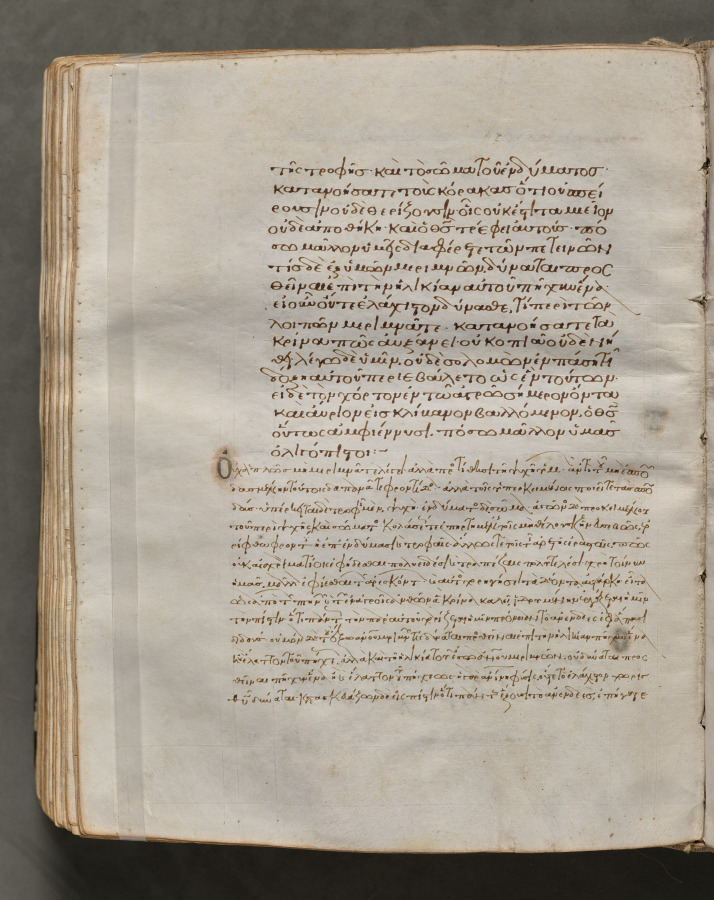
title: Text, folio 267 (verso), from a Gospel Book with Commentaries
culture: Byzantium, Constantinople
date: c. 1000–1100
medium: ink, tempera, and gold on vellum; leather binding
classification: Bound Volume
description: Each of the four gospels in this book opens on a page with brilliantly illuminated borders depicting the author of the text as well as birds—principally peacocks, symbols of the immortality of the soul—and fountains, representing the fountain of life and the salvation of the soul. This volume consists of 428 leaves with texts in Greek. Its level of sophistication suggests that it was probably written and decorated in a monastery in Constantinople.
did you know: Gospel books were carried in procession through Byzantine churches.